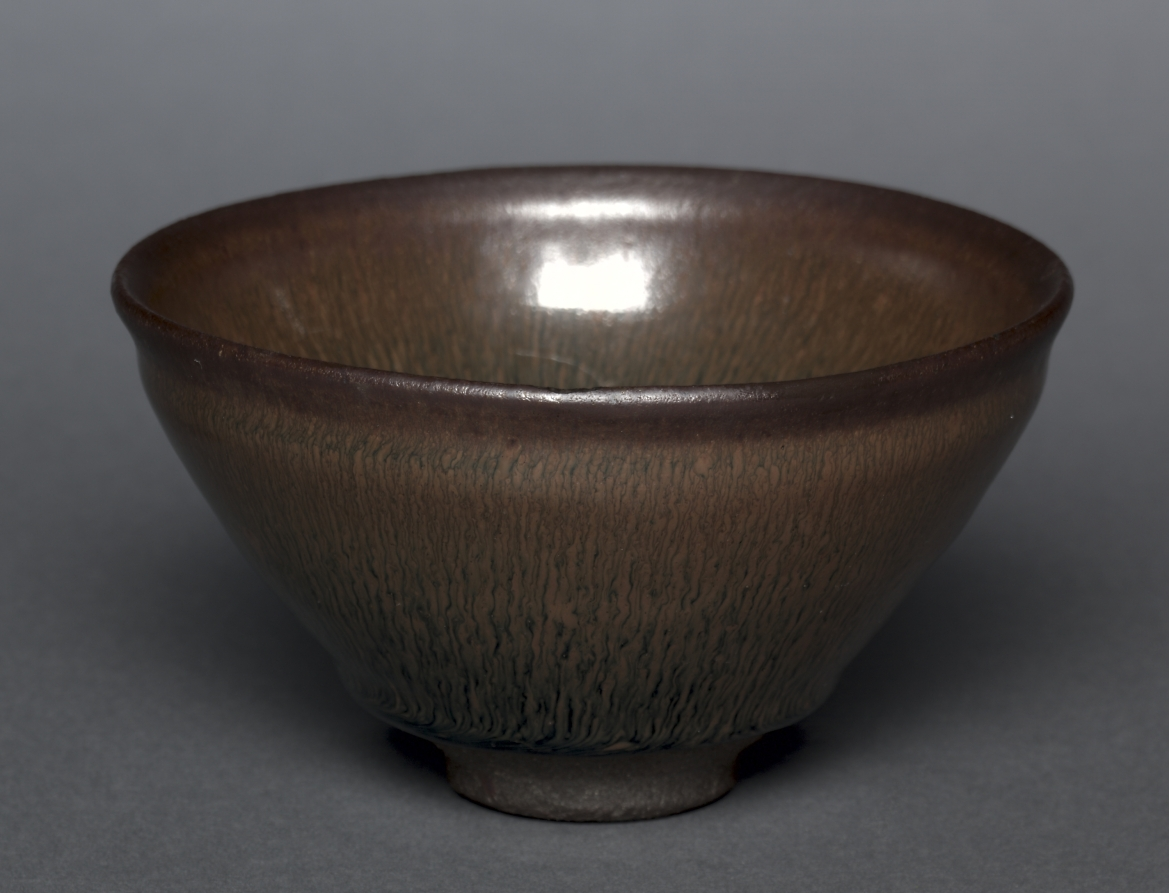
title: Tea Bowl: Jian Ware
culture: China, near Shui ch'i, Song dynasty (960-1279)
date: 960–1279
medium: stoneware with "hare's fur" glaze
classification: Ceramic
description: Jian ware was very popular with the tea cultures in China and Japan.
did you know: "Hare’s fur” glaze is named for the streaks resembling delicate hairs.